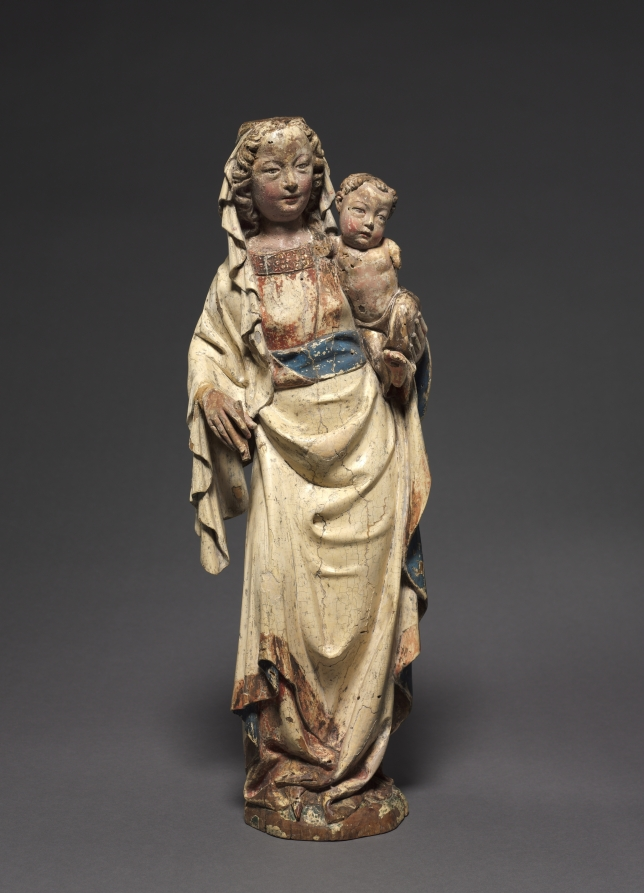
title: Virgin and Child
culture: Austria, Diocese of Passau, 14th century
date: c. 1370–1380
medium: painted lindenwood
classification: Sculpture